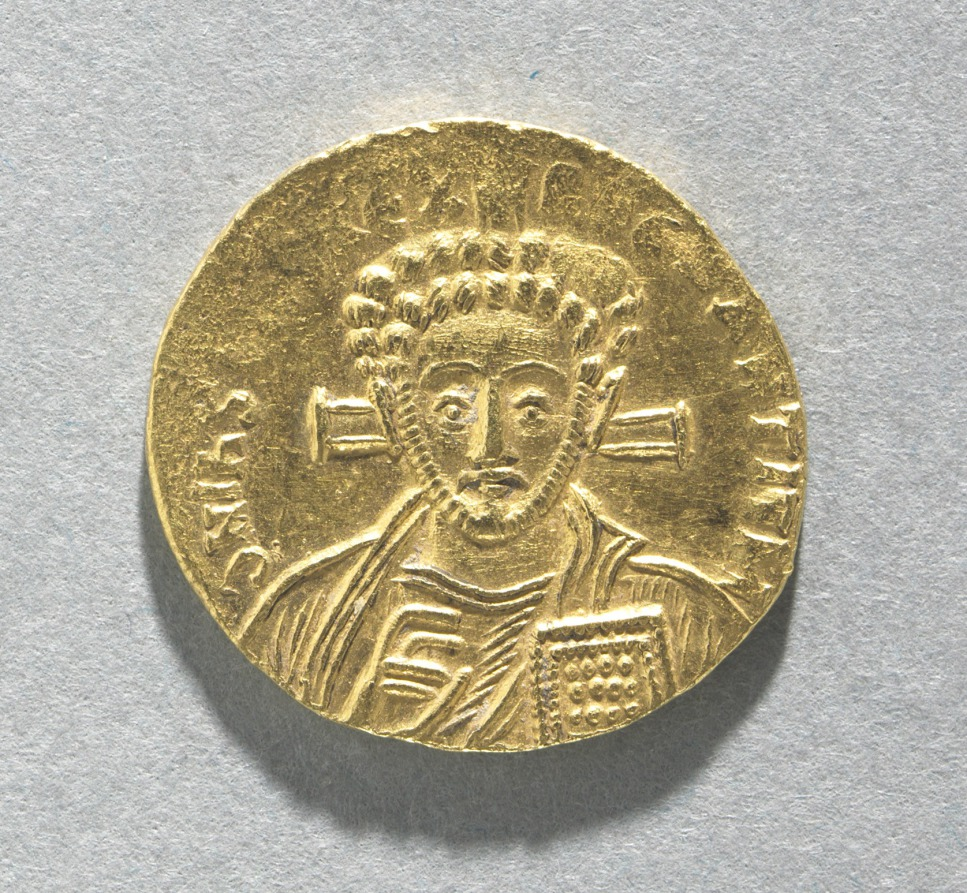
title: Solidus of Justinian II with Bust of Christ (obverse)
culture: Byzantium, Constantinople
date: 705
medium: gold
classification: Coins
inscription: Obverse: Bust of Christ, facing, with mustache, close beard, and curly hair; wearing pallium over colobium, his right hand is raised in benediction; his left holds the book of gospels. Behind his head is a cross. Inscription: dN IhS ChS REX REGNANTIUM Reverse: Bust of Justinian II, with mustache and close beard, wearing loros and crown with cross on circlet. In right hand he holds a cross potent on base with three steps, in his left hand he holds a patriarchal cross on globe inscribed with the letters PAX Inscription: DN IUSTINIANUS MULTUS AN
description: The vast number of surviving Byzantine coins attests to the level of trade across the empire. Controlled and supervised by the emperor, the producers of coins took care to represent his authority and reflect his stature. Talented artists were recruited to engrave the dies (molds) used for the striking of coins. Emperors increasingly came to include their heirs and co-emperors on their coinage, as well as other family members or even earlier rulers. Coins were recognized, then as now, as small, portable works of art. With their inscriptions and images, Byzantine coins provide valuable documentation of historical events and a record of the physical appearance of the emperors. The solidus was the basic gold coin of 24 karats. The tremissis was a gold coin of one-third the weight and value of the solidus. The nomisma in the 10th century replaced the solidus as the standard gold coin.